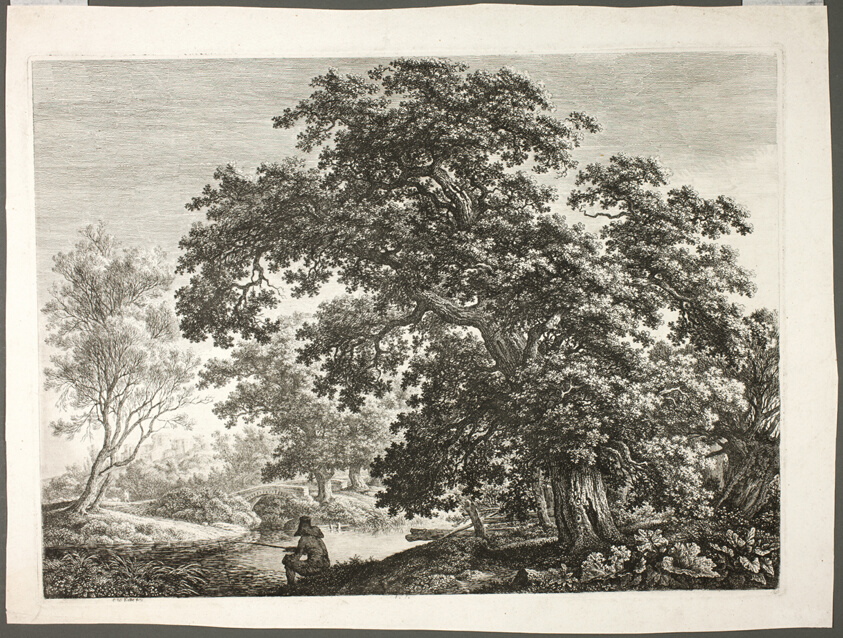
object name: Print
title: Fisherman in Wooded Landscape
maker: Carl Wilhelm Kolbe, the elder (German, 1759-1835)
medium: Etching on off-white wove paper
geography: Germany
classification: etching; print; prints and drawing